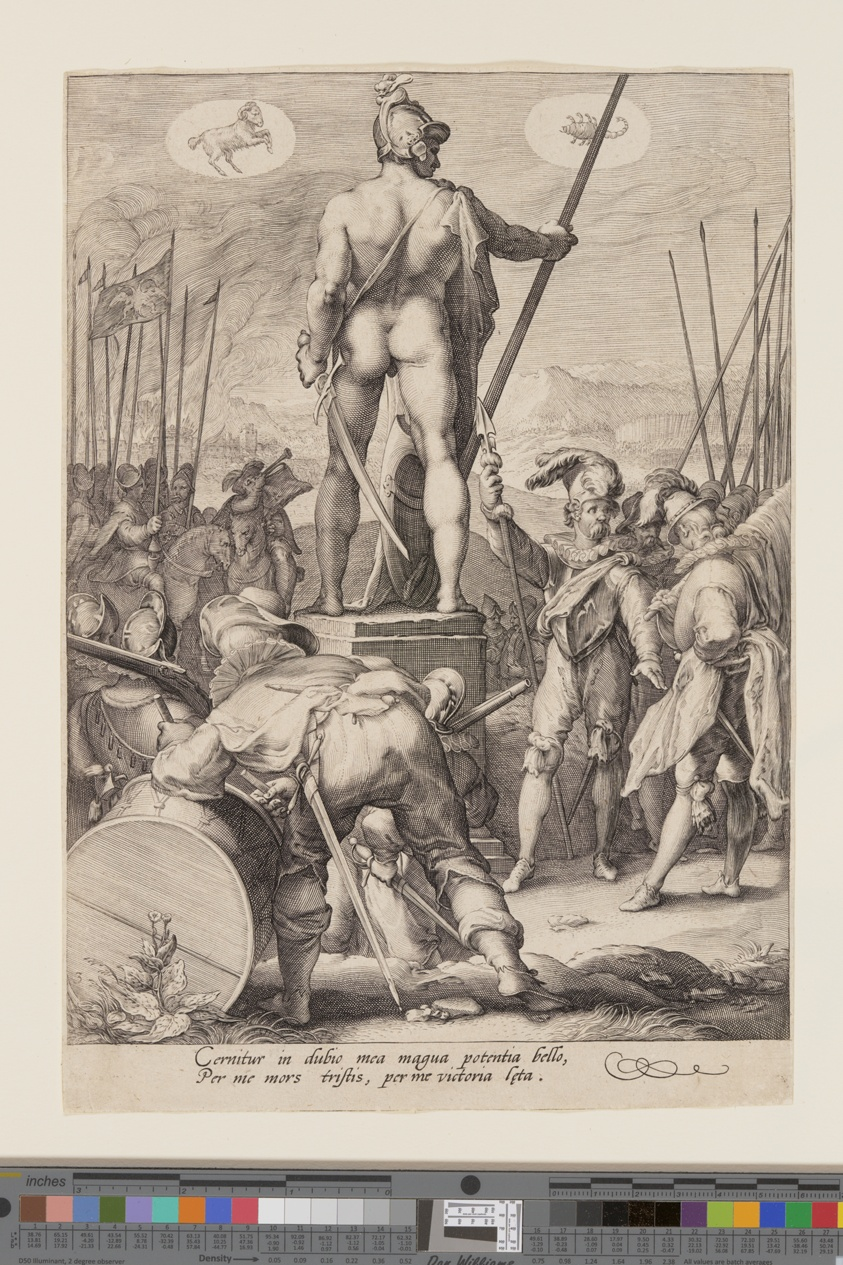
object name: Print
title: Mars Presiding over the Arts of War, from Seven Planetary Gods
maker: Jan Saenredam (Dutch, 1565–1607); after Hendrick Goltzius (Dutch, 1558–1617)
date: 1596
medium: Engraving on ivory laid paper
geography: Netherlands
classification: engraving; paper; print; prints and drawing